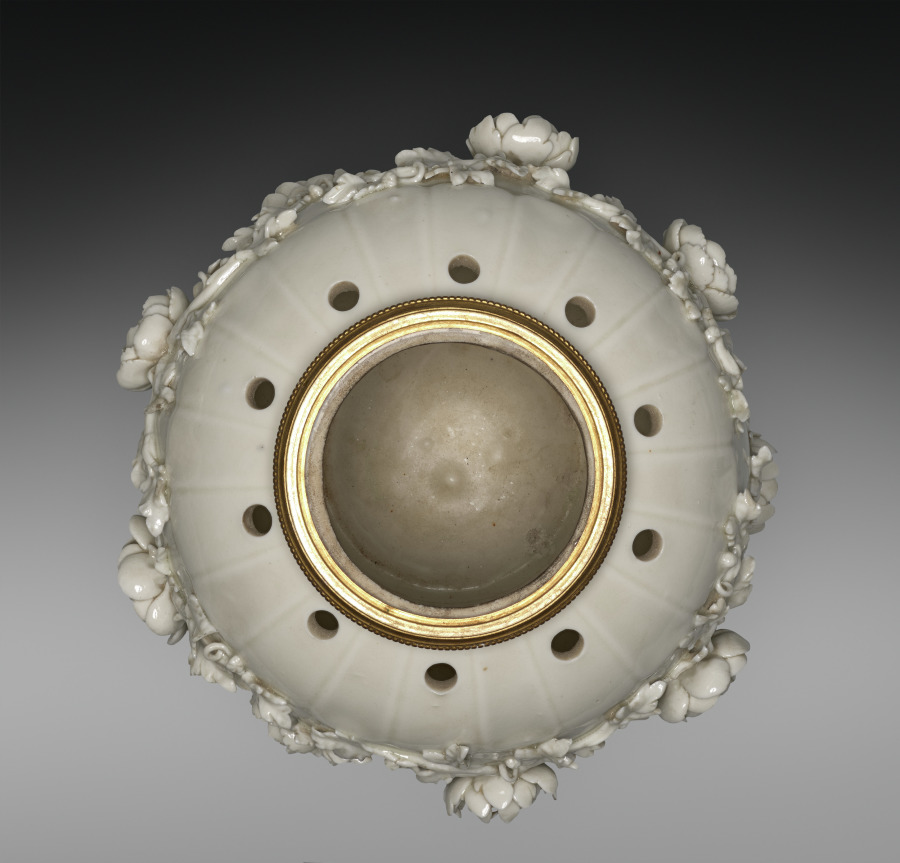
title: Potpourri Vase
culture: France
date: 1860–1880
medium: blanc-de-chine porcelain; gilt bronze mount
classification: Ceramic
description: This vase—part of a pair of covered vases—was created to contain potpourri, a mixture of flowers, herbs, and spices emitting ambient fragrance. This specific function offered a particularly fertile ground for the development of French porcelain from the mid-1700s, as manufactories experimented with forms, surface ornamentations, and placement of perforations. Produced by the firm of Edmé Samson in the 1800s, the vases pay homage to this history. While using updated technique and material, as well as more exuberant decorations, these vases draw upon designs by earlier innovators such as the Saint-Cloud manufactory.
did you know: Potpourri vases always have holes in the top to let the scent of dried spices and flowers contained within freshen the air around them.